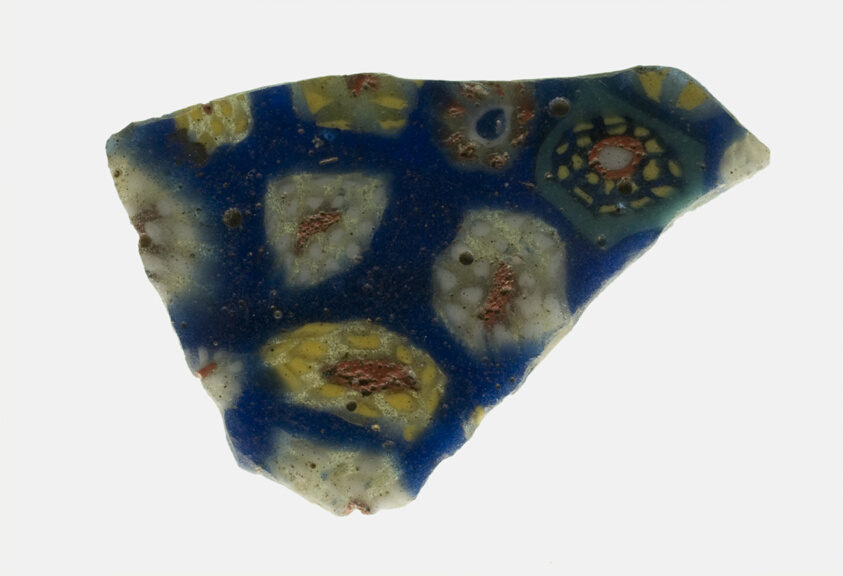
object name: Decorative Arts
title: Fragment of a Plate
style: roman (ancient, style or period), ancient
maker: Roman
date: 1st century BCE–1st century CE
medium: Glass, mosaic glass technique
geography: Roman Empire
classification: fragment; decorative arts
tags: decoration